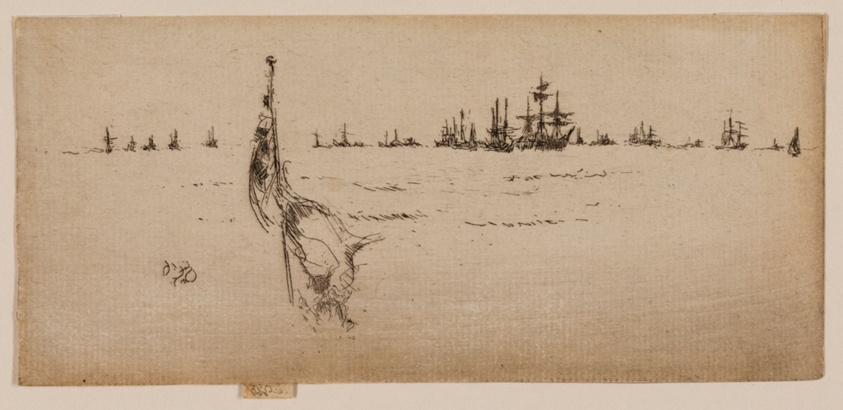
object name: Print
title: Dipping the Flag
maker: James McNeill Whistler (American, 1834-1903)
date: 1887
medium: Etching and drypoint in black ink on cream laid paper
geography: United States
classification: etching; drypoint; print; prints and drawing; paper